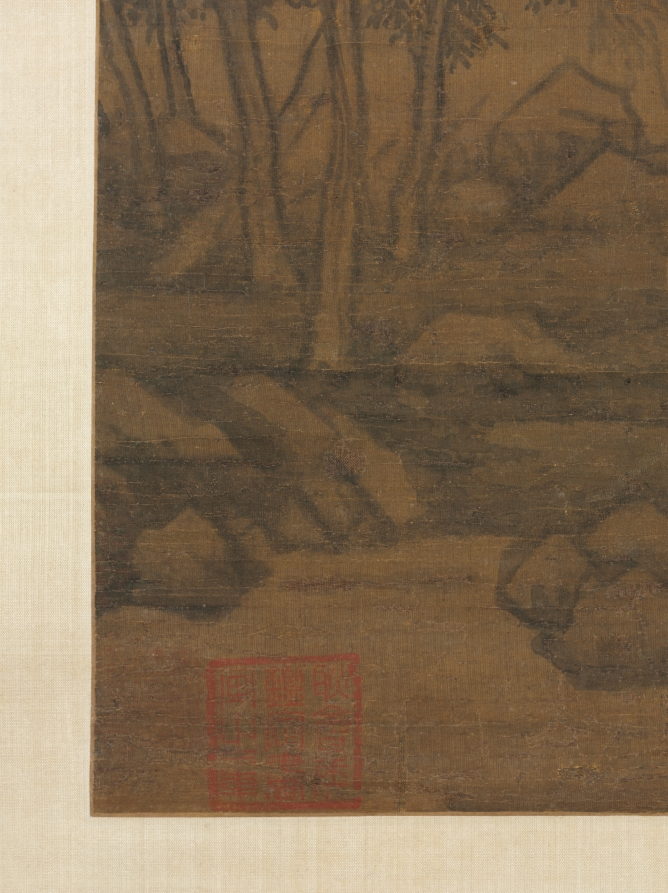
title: Summer Mountains (after Dong Yuan [active c. 937–75])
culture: China, Yuan dynasty (1271-1368)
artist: attributed to Huang Gongwang (Chinese, 1269–1354)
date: 1290–1354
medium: hanging scroll; ink and slight color on silk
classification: Painting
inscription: 【印】一峰道人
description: This monumental landscape is drawn in softly rounded strokes with darker lines frequently applied on top of lighter ones. This technique recalls one of the suggestions included in a collection of the artist's writings known as Secrets of Landscape Painting: The most difficult thing in painting is using the ink. The artist begins by using dilute ink and builds it up to the point where it begins to look right, then uses dense, black ink, applied fairly dry, and washes of deeper-toned ink. This technique distinguishes the fields from the paths, the far from the near. Huang Gongwang may have learned this technique from observing nature through the eyes of an earlier master, Dong Yuan, a painter whose style he shared.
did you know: The wet hills and moist, rich atmosphere evoke the southern Chinese summer, characterized by monsoon rains and lush growth.